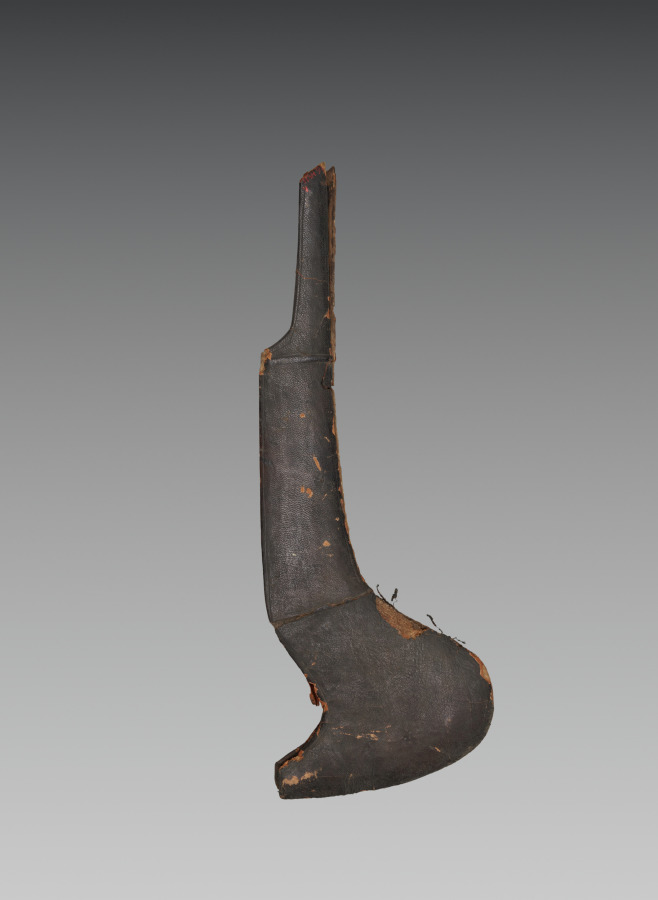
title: Scabbard for Knife or Axe (Kharga)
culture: Nepal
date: 1800s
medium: iron with wooden handle and leather scabbard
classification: Arms and Armor